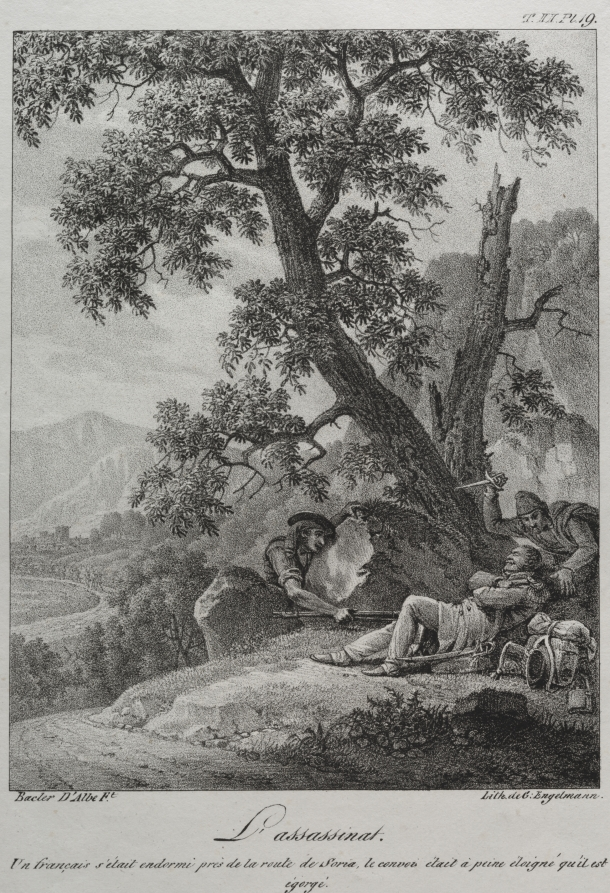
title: Spanish Campaign: The Assassination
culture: France, late 18th-early 19th century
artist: Baron Louis Albert Guillain Bacler d'Alber (French, 1761–1824)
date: 1807–24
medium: lithograph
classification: Print